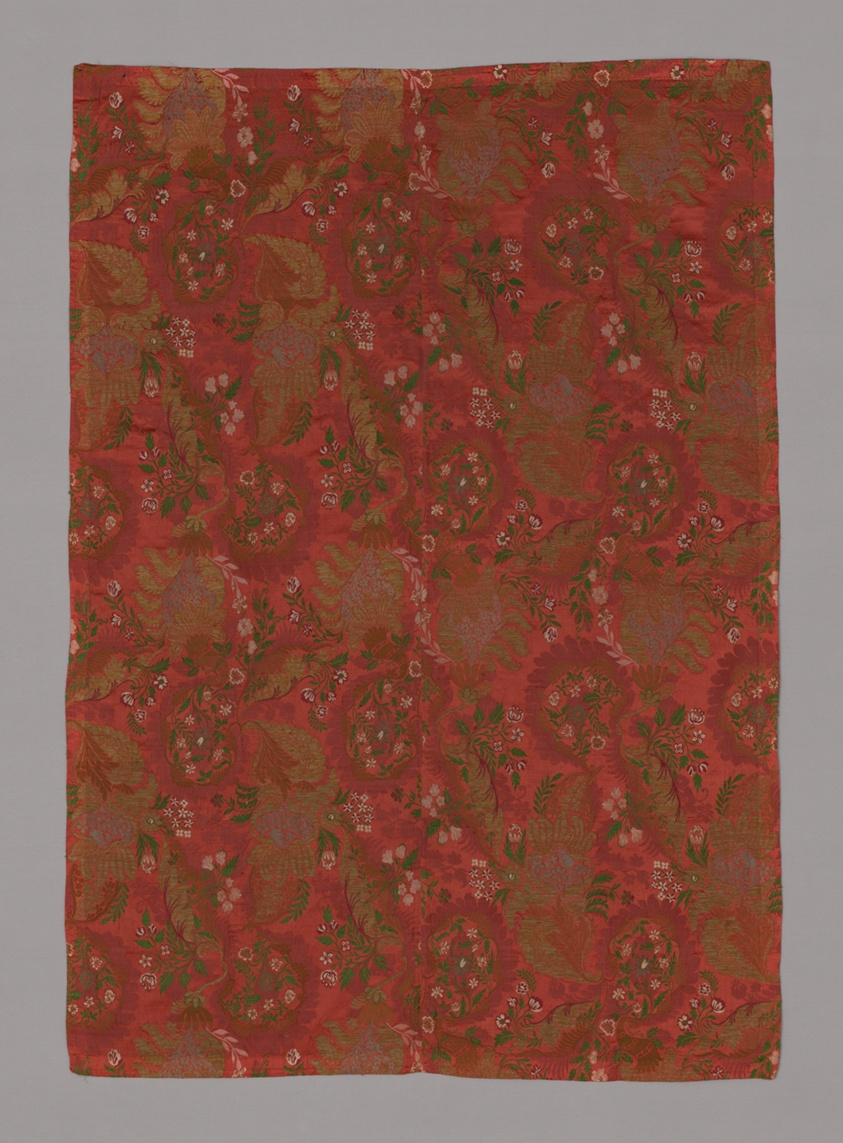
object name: Textile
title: Panel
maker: France or Spain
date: 18th century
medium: Brocaded damask, ground, red satin damask; pattern, fancy gold and silver and green and white silk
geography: France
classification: textile; weaving